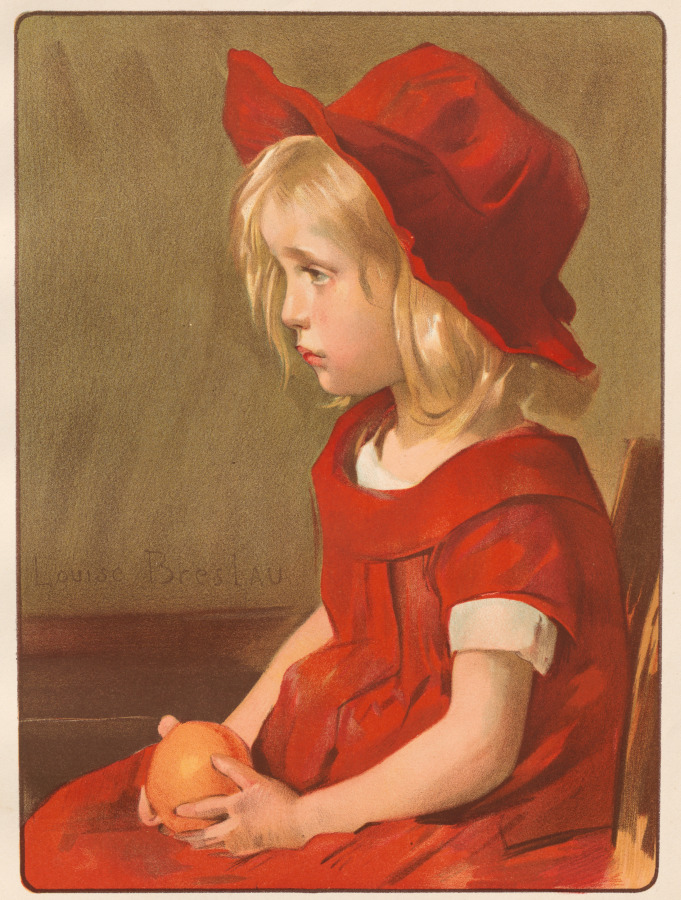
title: Fillette à l'Orange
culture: France, Paris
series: L'Estampe Moderne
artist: Louise Breslau (Swiss, 1856–1927)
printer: Imprimerie Champenois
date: 1899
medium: Color lithograph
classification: Bound Volume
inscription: Printed across lower left center of image: Louise Breslau; lower right corner of sheet: blindstamp of l'Estampe Moderne (Lugt 2790)